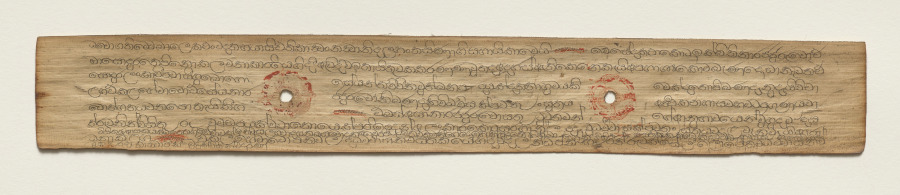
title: Leaf from a Buddhist Manuscript (verso)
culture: Sri Lanka, Singhalese, Late 17th century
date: c. 1700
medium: fiber paper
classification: Manuscript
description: Palm leaf material is still used for manuscripts in Sri Lanka. The palm leaves are prepared first by boiling them, drying them in the sun, and then rubbing them with oils. Scribes then use a metal stylus to incise the text. Then charcoal powder is wiped across the pages, filling in only the inscribed lines.